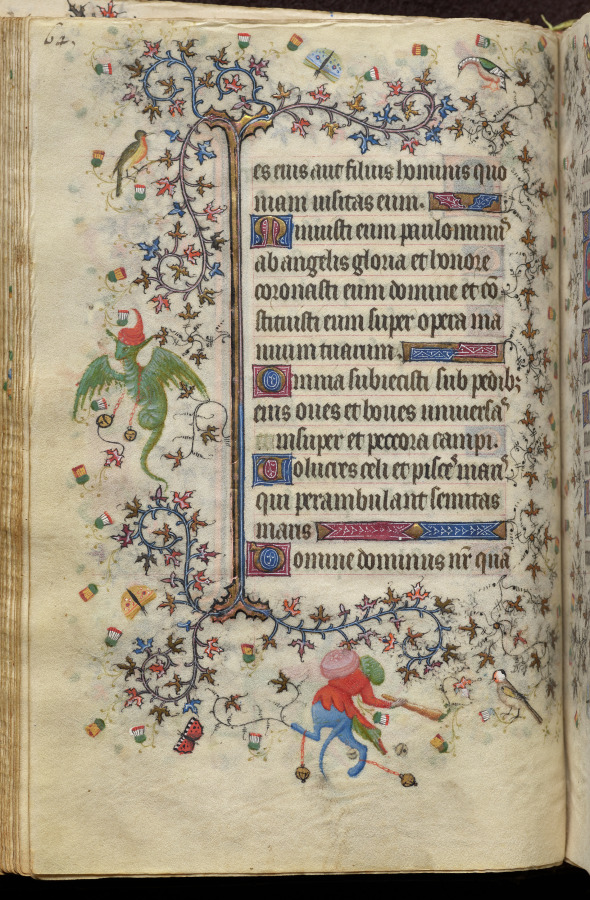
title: Hours of Charles the Noble, King of Navarre (1361-1425): fol. 32v, Text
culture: France, Paris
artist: Master of the Brussels Initials and Associates (French)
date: c. 1405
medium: ink, tempera, and gold on vellum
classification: Bound Volume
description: This precious volume was obviously highly prized by its owner, the French-born King of Navarre, who had his coat of arms painted on no less than twenty folios. Rather than directly commissioning this manuscript from a specific workshop, it seems that Charles the Noble acquired his book of hours -- perhaps ready-made for the luxury market -- while on a trip to Paris in 1404-05. A collaborative effort, six painting styles are evidenced within the pages of this codex, those of two Italians, two Frenchmen, and two Netherlanders. The painter who was responsible for the planning and decoration of the book, and who produced seventeen of the large miniatures, was a Bolognese artist known as the Master of the Brussels Initials. His principal assistant, responsible for most of the borders, was a Florentine who signed his name "Zecho" da Firenze on folio 208 verso.